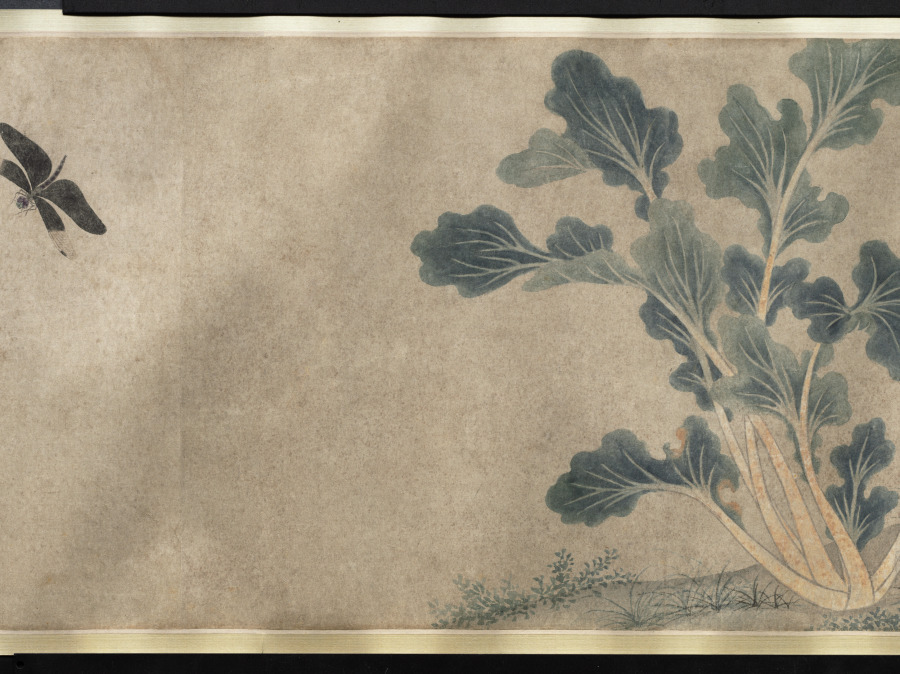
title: Insects and Flowers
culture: China, Qing dynasty (1644-1911) or Republican period (1912-49)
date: c. 1900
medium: Handscroll, ink and color on paper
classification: Painting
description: More than 26 feet long, this scroll presents insects, reptiles, and plants in delicate brushwork and pale colors, referring in style to earlier Southern Song dynasty (1127–1279) bird-and-flower paintings. Upon closer inspection, ants dismember a butterfly and reptiles wait to ambush their prey. An inscription at the end of the painting gives us an idea of its meaning: Attributed to the Qing dynasty scholar Zhang Xigeng (張錫庚, 1801–1861), the inscriber relates the work to an earlier painting by Qian Xuan (錢選, c. 1235–before 1307) and further suggests that the painting may allude to the relentlessness of natural selection. By drawing a parallel to tumultuous episodes in Chinese history, the writer might even hint at the domestic rebellions and the aggression of Western powers against China in his lifetime, particularly the Opium Wars (1839–60).